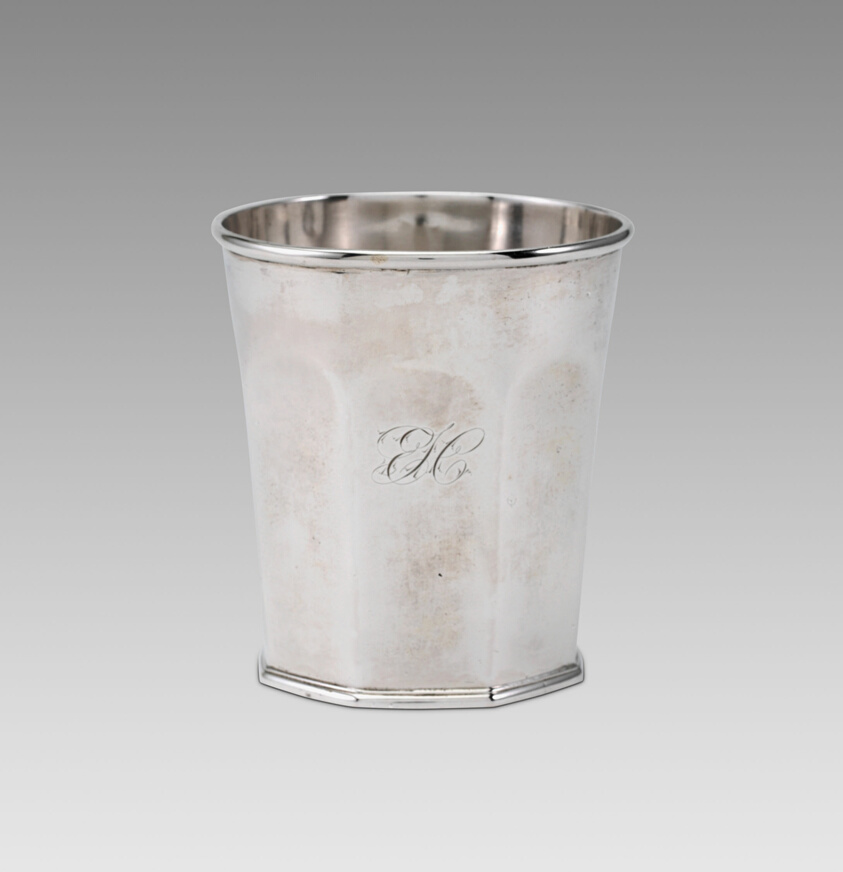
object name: Metalwork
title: Beaker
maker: Gerardus Boyce; American, 1795/96–1880; New York, NY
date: 1820–57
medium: Silver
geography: New York City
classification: drinking vessel; silver; american decorative arts; american arts; decorative arts